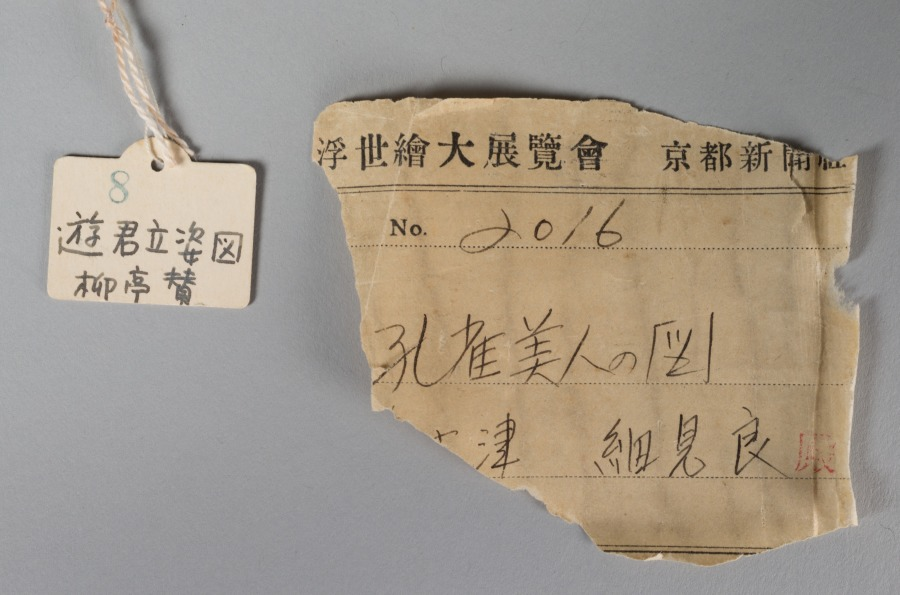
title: Beauty (Bijin)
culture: Japan, Edo period (1615–1868)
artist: Katsushika Hokusai (Japanese, 1760–1849)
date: c. 1775–1849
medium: hanging scroll; ink and color on paper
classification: Painting